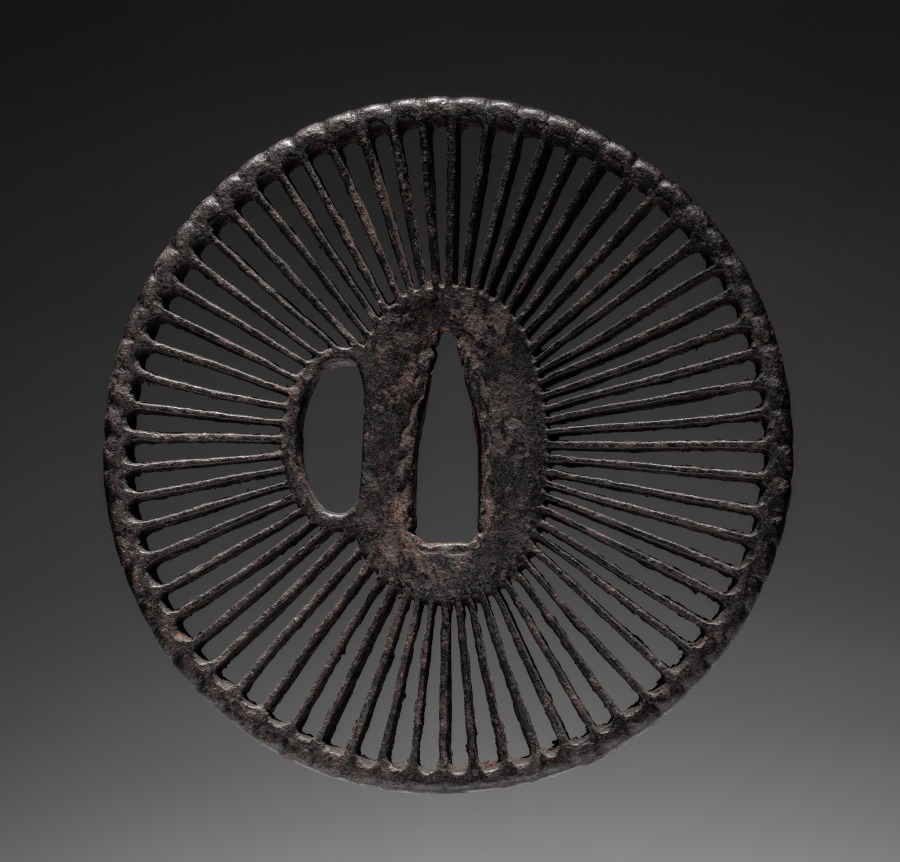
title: Sword Guard (Tsuba)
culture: Japan, possibly Edo period (1615-1868)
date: c. 1615–1868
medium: iron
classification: Arms and Armor